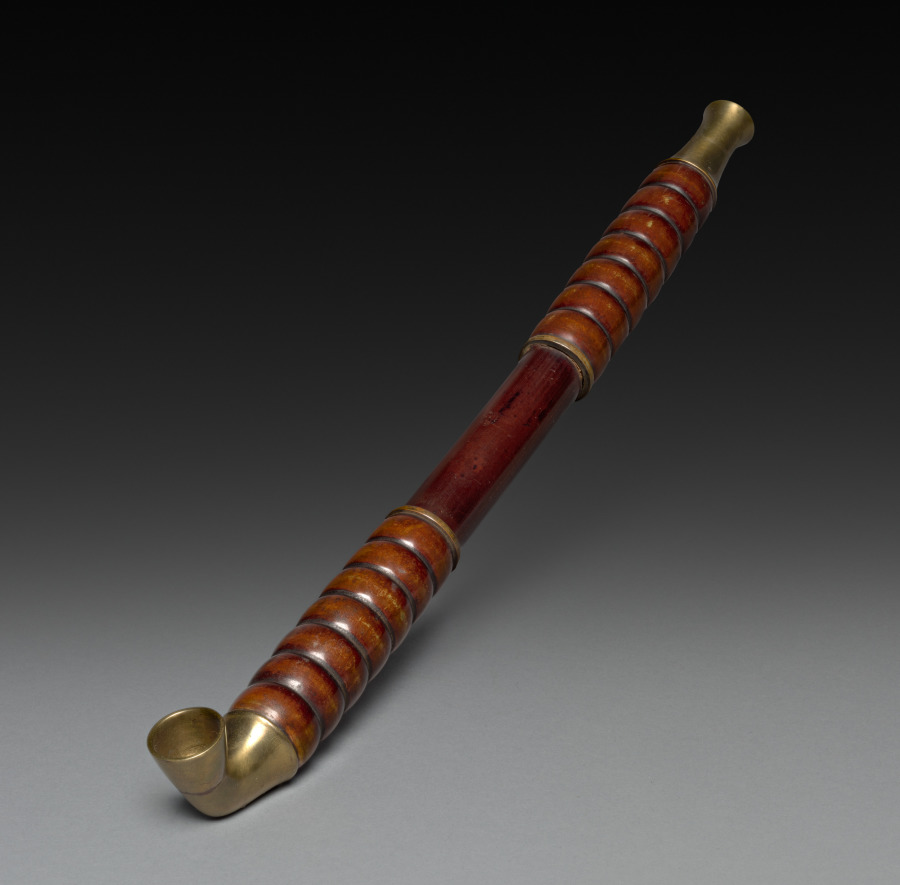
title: Tobacco Pipe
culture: Japan, Edo period (1615–1868)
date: early to mid-1800s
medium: bamboo, metal, and brass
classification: Miscellaneous